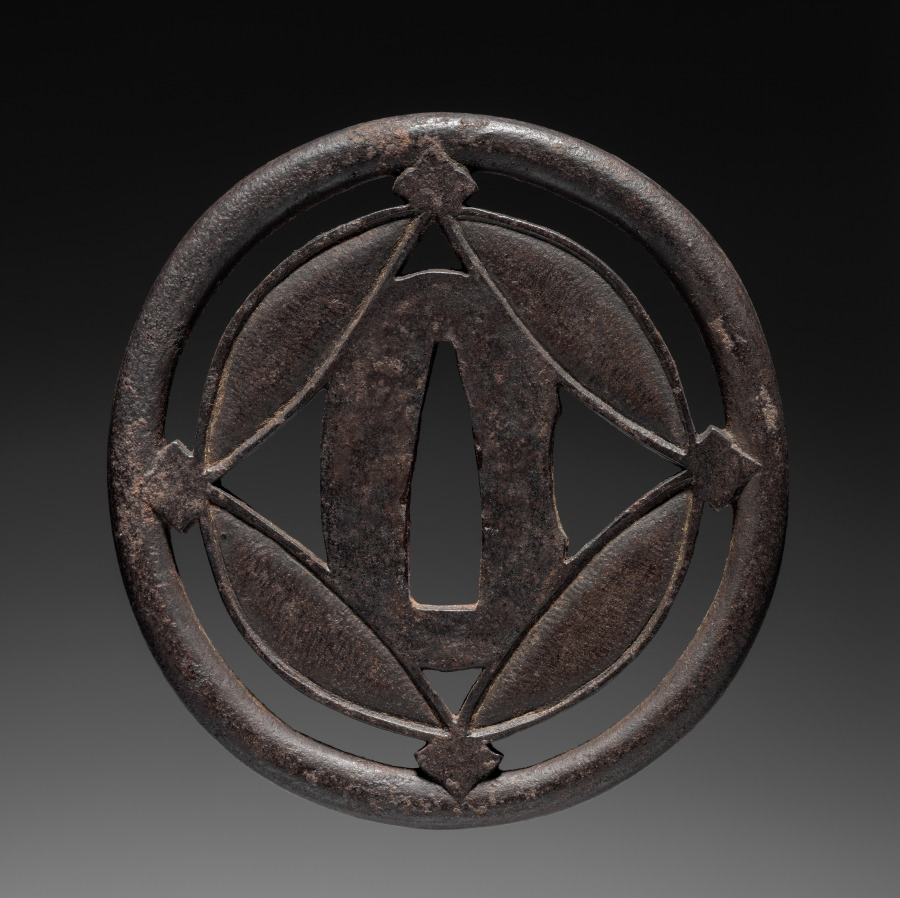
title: Sword Guard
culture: Japan, Edo period (1615–1868)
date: late 1700s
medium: iron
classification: Arms and Armor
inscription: Signnature: Ichiryusai Yoshinari